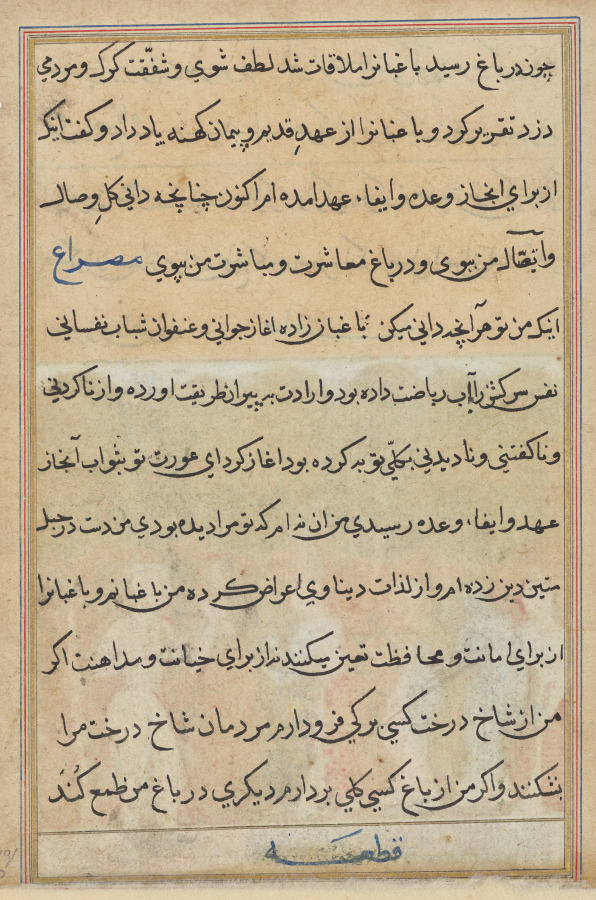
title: Page from Tales of a Parrot (Tuti-nama): text page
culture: Mughal India, court of Akbar (reigned 1556–1605)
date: c. 1560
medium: gum tempera, ink, and gold on paper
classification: Painting